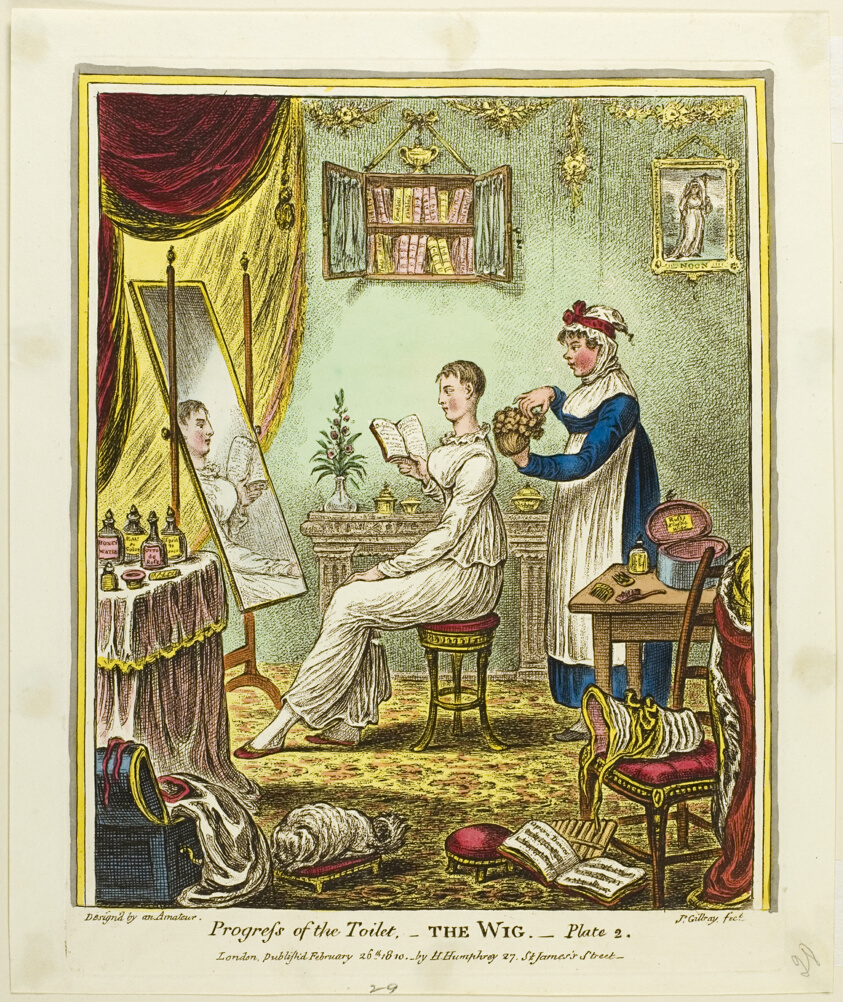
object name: Print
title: The Wig, plate two from Progress of the Toilet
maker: James Gillray (English, 1756-1815); published by Hannah Humphrey (English, c. 1745-1818)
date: published February 26, 1810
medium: Hand-colored etching on cream wove paper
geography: England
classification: etching; print; prints and drawing